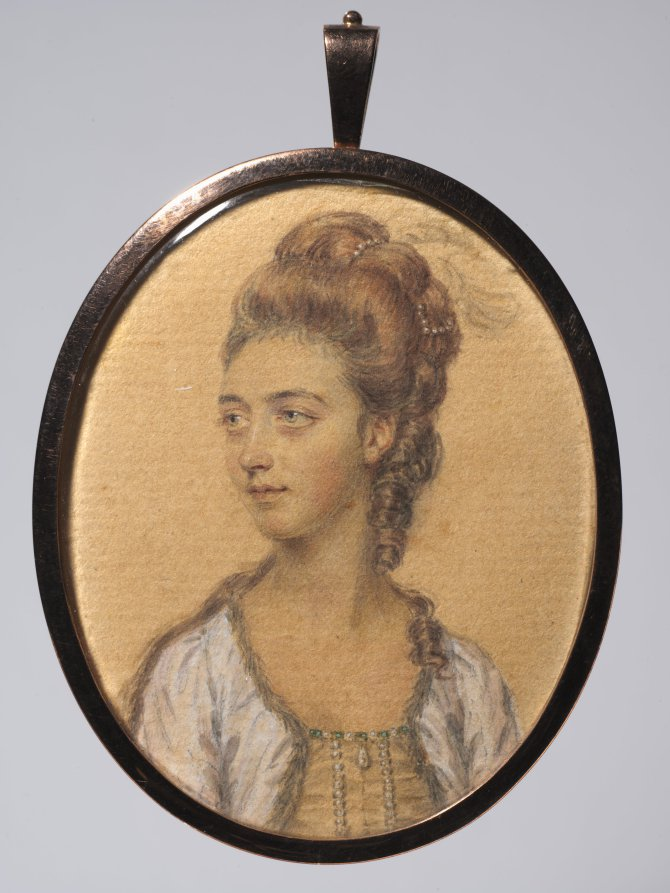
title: Portrait of Mrs. Nathaniel Bailey, née Lamack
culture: England, 18th century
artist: John I Smart (British, 1741–1811)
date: c. 1776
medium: graphite and wash on laid paper in a modern gold frame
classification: Portrait Miniature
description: Although it is impossible to say if it was always part of the artist’s process to execute a preparatory sketch prior to painting each miniature, we do know that John Smart retained many hundreds of these sketches. A group of preparatory sketches—of which this portrait is one—descended through the Smirke family after Smart’s daughter Sarah gave a sketchbook containing preparatory portrait studies to her friend Mary Smirke, sister of the celebrated Victorian architect Sydney Smirke. This book was probably broken up around 1877 when it was divided between Sydney’s daughters Mary Jemmett and Mrs. Lange, whose portions were both sold at auction in 1928. Compared to his contemporaries George Engleheart (1752–1829) and Andrew Plimer (1763–1837), whose female sitters were often painted in similar simple white gowns, Smart often lavished more attention on the costumes in his portraits of women, whose dresses incorporated colored silks, printed fabrics, and luxury trimmings like lace and fur, as seen in this portrait. Mrs. Bailey wears a violet surcoat trimmed with fur, worn over a cream-colored gown trimmed with a border of alternating pearls and blue stones and two vertical rows of pearls with one large pearl between them. Her brown hair is dressed high with ringlets descending down her neck and over her shoulders. The coiffure is ornamented with a strand of pearls and two ostrich plumes. The case is modern, and there is a brownish cast to what was originally pale, cream-colored paper—the result of light exposure changing the color over time. Smart’s preparatory sketches were compiled in books but once removed were often grouped in frames or placed in lockets such as this one. This portrait was part of the Smirke collection owned by Mary Jemmett, who sold it at Christie’s, London, on February 29, 1928. Lot 61 for this sale is described as “Mrs. Bailey, wearing pale mauve and white dress, her hair dressed high and trimmed with feathers.” The sitter, Mrs. Nathaniel Bailey (née Lamack), of Clapham, married the member of Parliament for Abingdon on March 18, 1773. Her husband was of sufficient means and is recorded in 1775 as having performed his annual distribution of £100 of bread and meat to the poor of his borough. Little else is known about this sitter. This drawing was a preparatory study for a portrait on ivory, signed and dated 1776, and measuring 2 inches high. The ivory miniature was formerly in the Ashcroft collection and was sold at Sotheby’s, London, in May 1946 to Arthur Jaffé, having previously been on loan to the Victoria and Albert Museum from 1924 to 1939. In this sale the miniature is described as “An Attractive Miniature of a Lady, by John Smart, signed and dated 1776, head and gaze three-quarters dexter, a white feather and pearls in her high piled chestnut hair, ringlets falling to the shoulders, wearing a pearl and emerald bordered low-cut cream dress and fur trimmed lavender jacket.” It most recently sold at Christie’s, London, in 2003. This portrait miniature is identical to the preparatory sketch here, both of which describe the sitter as wearing a faintly violet costume, though this color is no longer discernible in the sketch. The current location of the miniature on ivory is unknown. Edward Greene donated this and nine other preparatory studies by Smart to the Cleveland Museum of Art in 1941 and 1942. This sketch was acquired by Greene from Leopold Davis for around $260 in 1930. Although this portrait was probably part of the same sketchbook as the other nine purchased by Greene, Davis did not indicate whether or not this was indeed the case. The majority of these sketches were in a compromised condition, with fading and foxing especially prevalent.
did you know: Sketches helped John Smart work out the particulars of a portrait before commencing the miniature on ivory, and they were useful in the event that a duplicate might later be required.